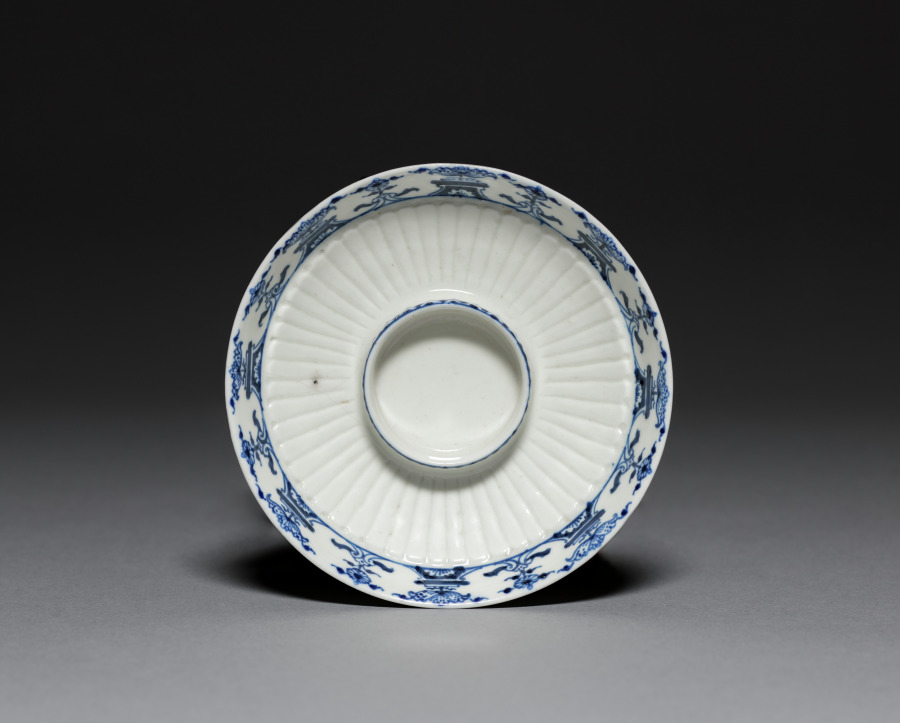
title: Saucer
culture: France, Saint Cloud, 18th century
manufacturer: Saint Cloud Porcelain Factory (French)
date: c. 1720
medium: soft-paste porcelain with underglaze blue decoration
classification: Ceramic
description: The first extensive manufactory of soft-paste porcelain in France was carried out at a factory at Saint-Cloud, near Paris. The earliest porcelains were produced there in 1693, and the factory remained a significant one throughout the first half of the 18th century. Bacause of technical difficulties, most of the wares produced at Saint-Cloud are rather small in size and heavily potted. Stylistic restraint was exercised in both the form and decoration of its wares. Underglaze blue was frequently employed at Saint-Cloud, and pieces of the type resemble closely those attributed to Rouen, leading to the speculation that the two factories were closely related.